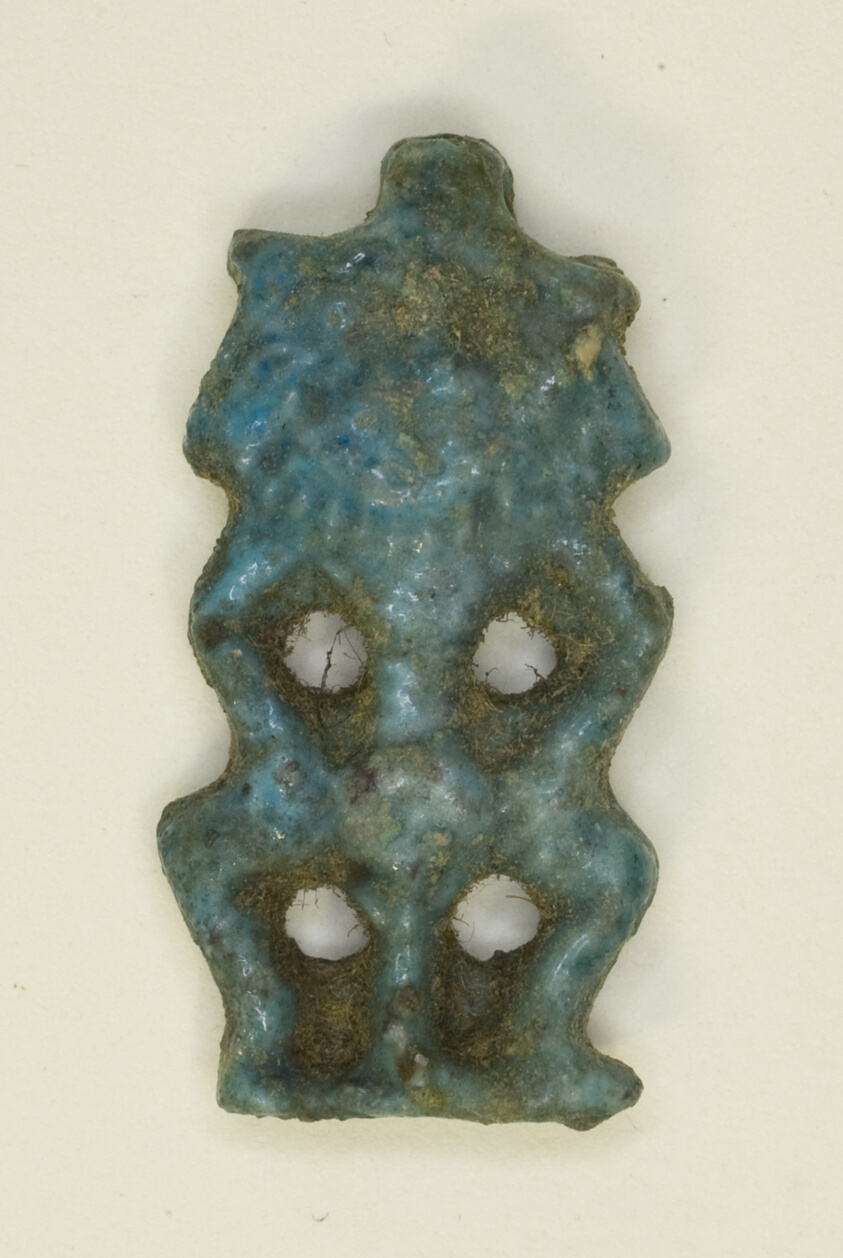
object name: Costume and Accessories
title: Amulet of the God Bes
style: egyptian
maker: Egyptian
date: New Kingdom–Third Intermediate Period (about 1500–664 BCE)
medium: Faience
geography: Egypt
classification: amulet; jewelry; glass; ancient art; costume; faïence (composite material)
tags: gods (deities)